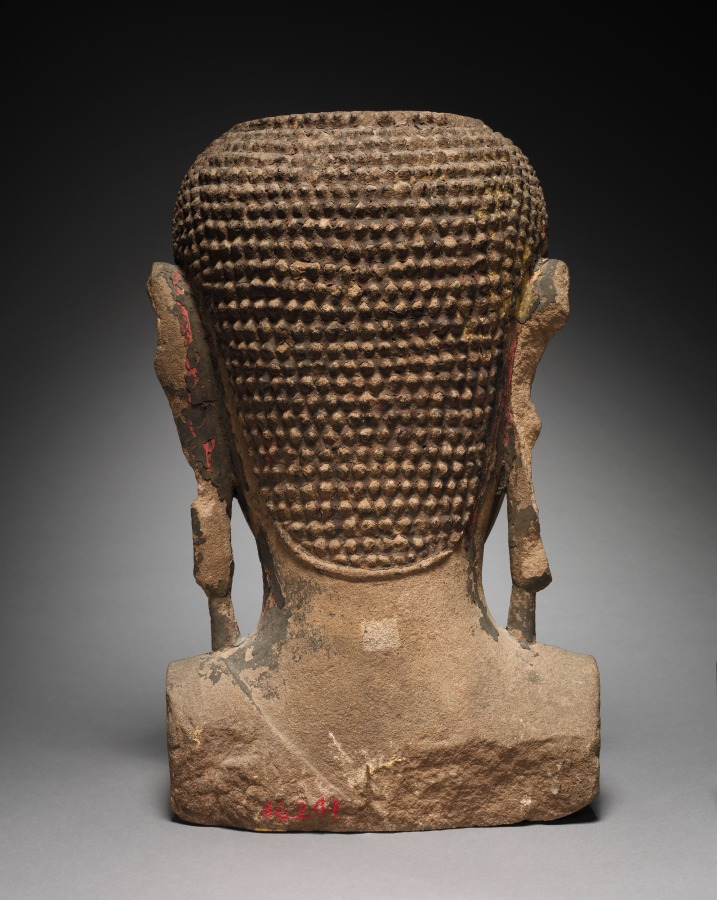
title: Head of Buddha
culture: Thailand, Ayutthaya, 14th-15th century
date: 1350–1425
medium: sandstone and lacquer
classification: Sculpture